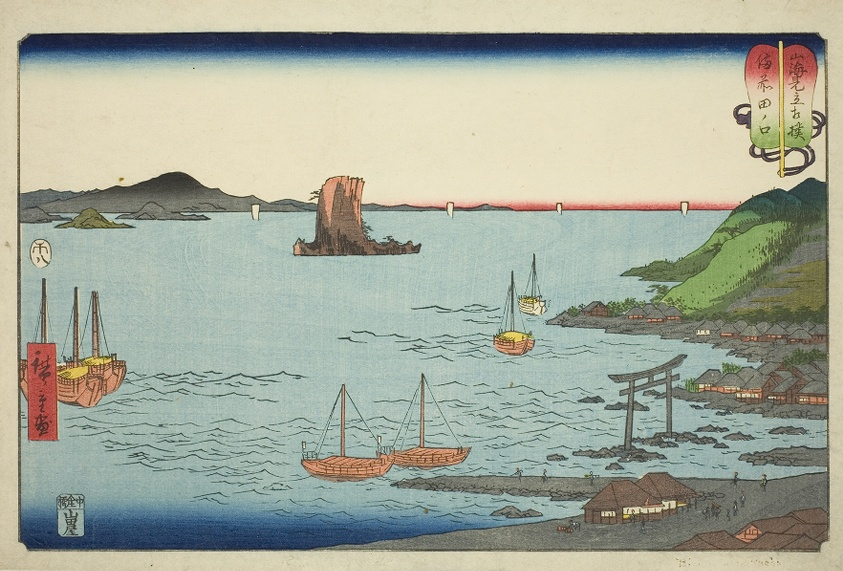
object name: Print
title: Tanokuchi in Bizen Province (Bizen Tanokuchi), from the series "Wrestling Matches between Mountains and Seas (Sankai mitate zumo)"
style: Japanese (culture or style)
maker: Utagawa Hiroshige 歌川 広重; Japanese, 1797-1858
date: 1858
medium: Color woodblock print; oban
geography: Japan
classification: woodblock print; print; asian art